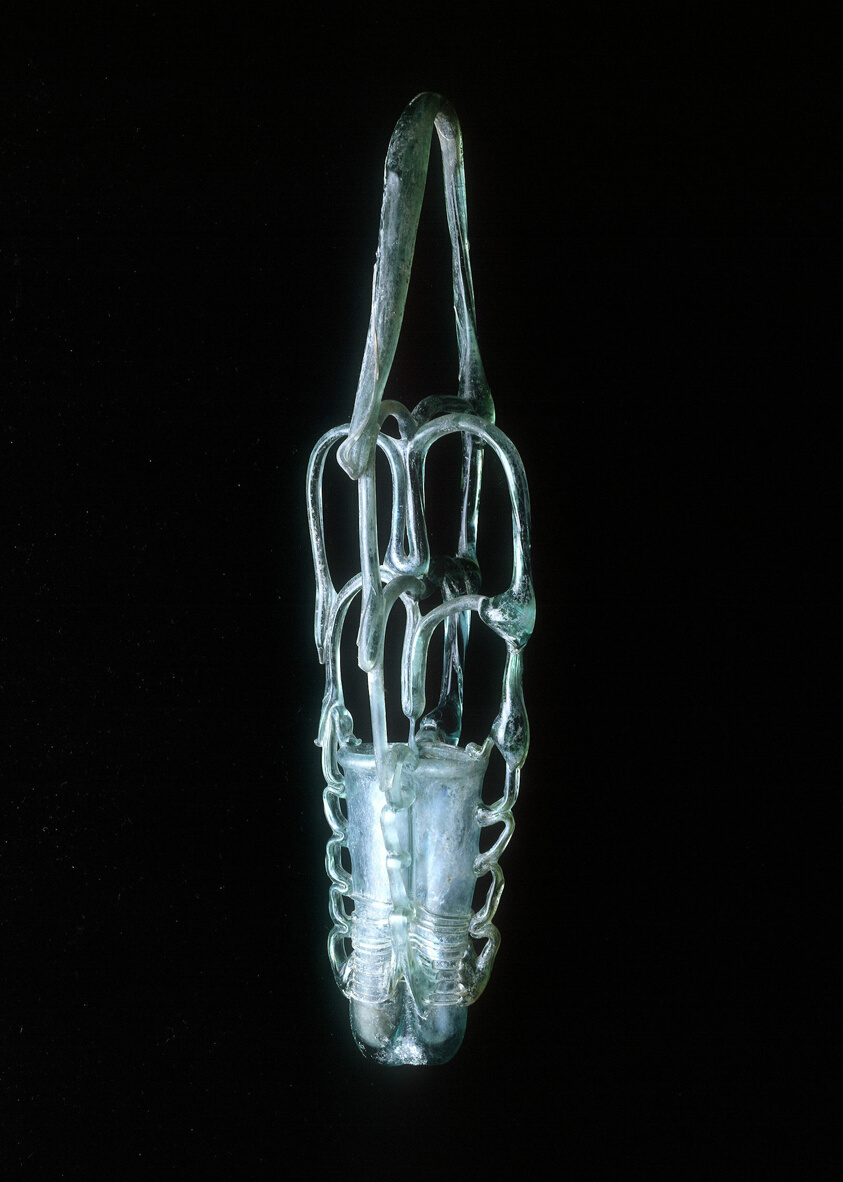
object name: Vessel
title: Kohl Container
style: imperial (roman), palestinian, ancient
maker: Byzantine; Eastern Mediterranean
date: 5th-6th century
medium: Glass, blown technique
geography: Palestine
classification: personal grooming / hygiene / cosmetic container; glass; vessel; ancient art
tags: beauty, rituals, containers